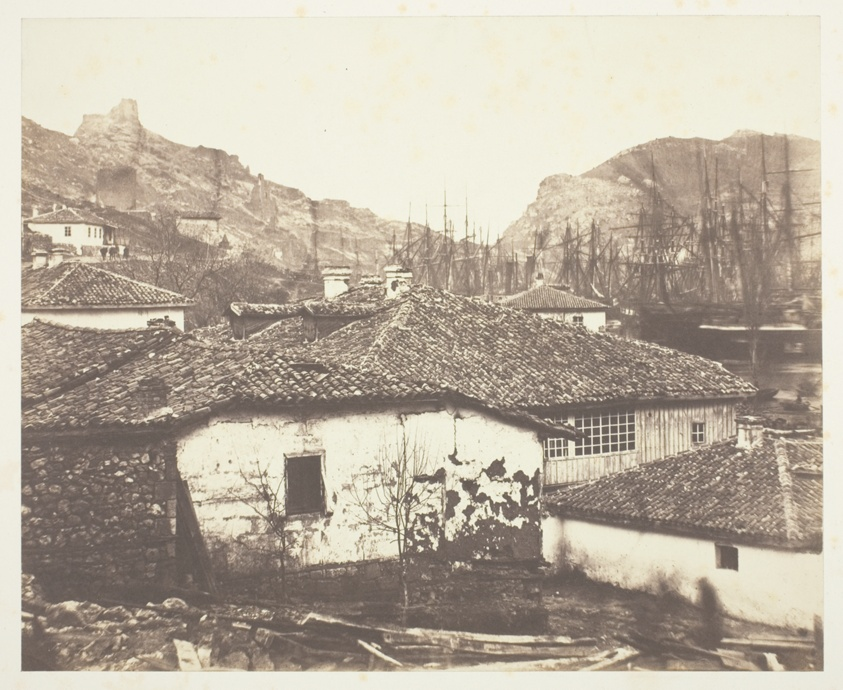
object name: Photograph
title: Cottages at Balaklava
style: 19th century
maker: Roger Fenton (English, 1819–1869)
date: 1855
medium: Salted paper print, from the album "Photographic Pictures of the Seat of War in the Crimea" (1856)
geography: England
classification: salted paper print; photographic process; photography; photograph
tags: Collected by Hugh Edwards